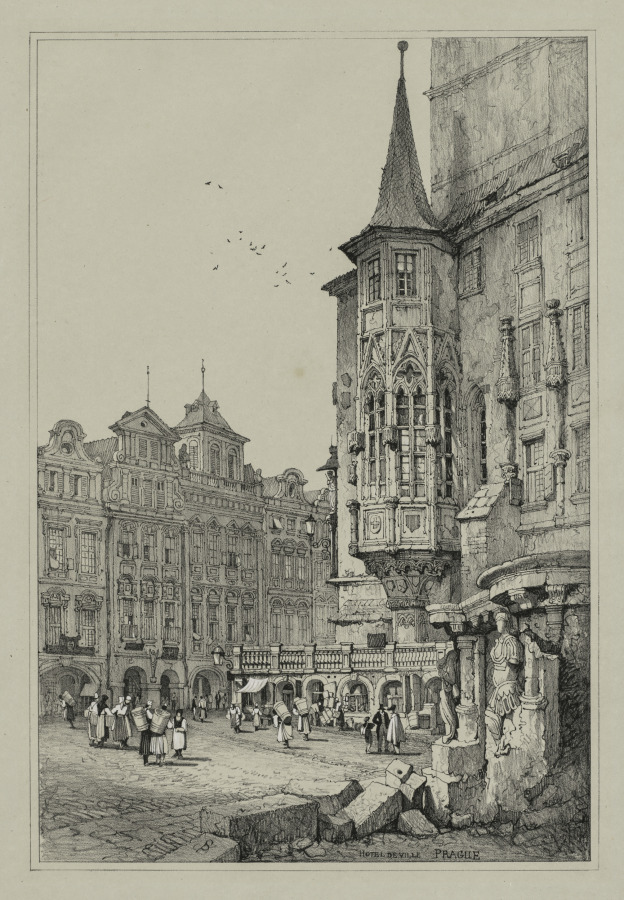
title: Facisimilies of Sketches made in Flanders and Germany: Hotel de Ville, Prague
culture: England, 19th century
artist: Samuel Prout (British, 1783–1852)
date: 1833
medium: lithograph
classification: Print